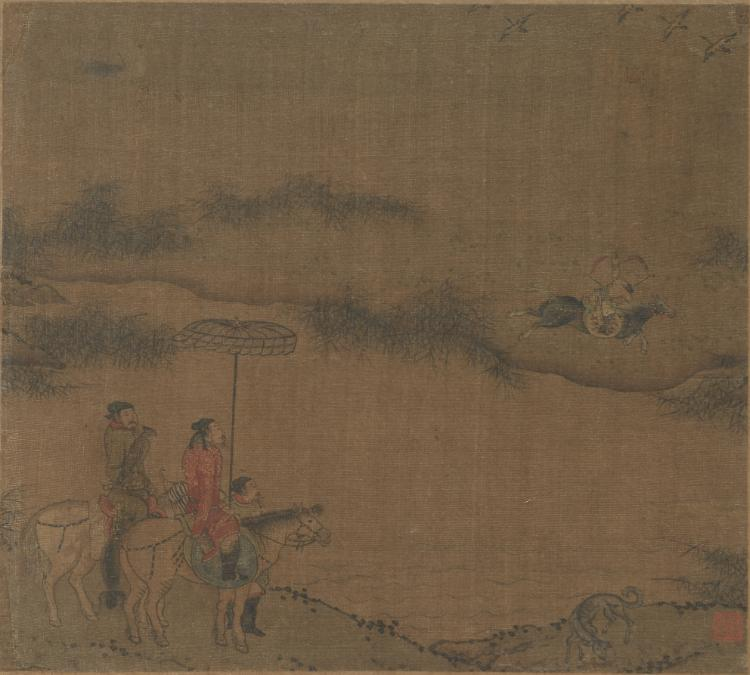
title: Three Horsemen Hunting Wild Geese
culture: China, Song dynasty (960-1279)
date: 960–1279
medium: Album leaf, ink and color on silk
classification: Painting